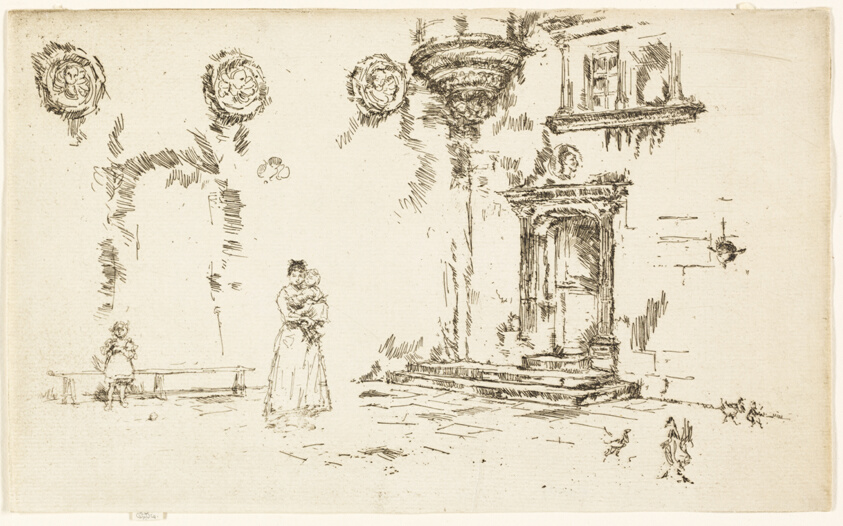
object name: Print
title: Hôtel Lallemont, Bourges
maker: James McNeill Whistler (American, 1834-1903)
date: 1888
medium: Etching and drypoint with foul biting in black ink on ivory laid paper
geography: United States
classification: etching; foul biting; print; prints and drawing; drypoint; paper